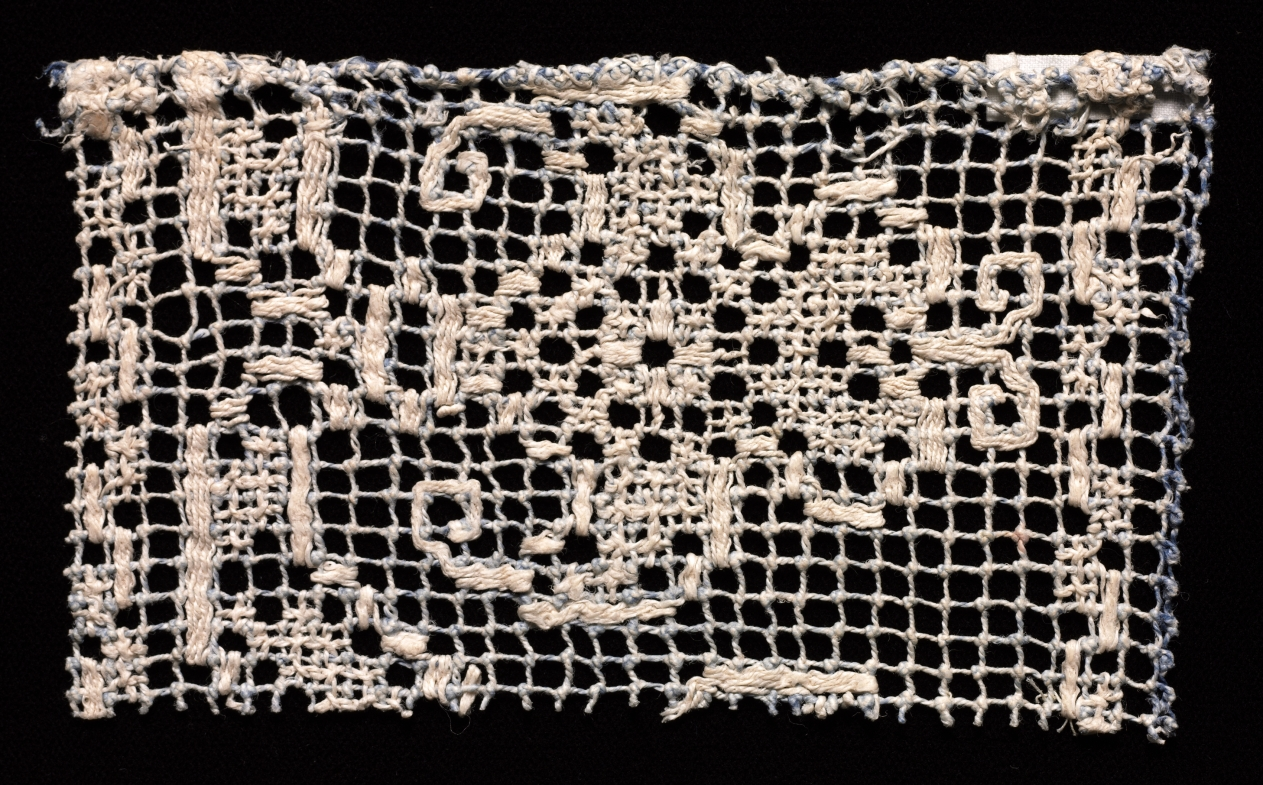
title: Fragment with a Floral (tendril) Motif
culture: Italy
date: 1500s–1600s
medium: Bleached and blue dyed linen (est.): needle lace, filet/lacis (knotted ground and darned in one and two directions)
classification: Lace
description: The light blue ground of this fragment of lace, together with the varying thicknesses of threads used for the ground and the embroidered pattern, create a sense of depth in the textile. The white thread is bleached linen and the blue is linen that has been bleached and dyed.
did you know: The word lace derives from the Latin laqueus, meaning noose.